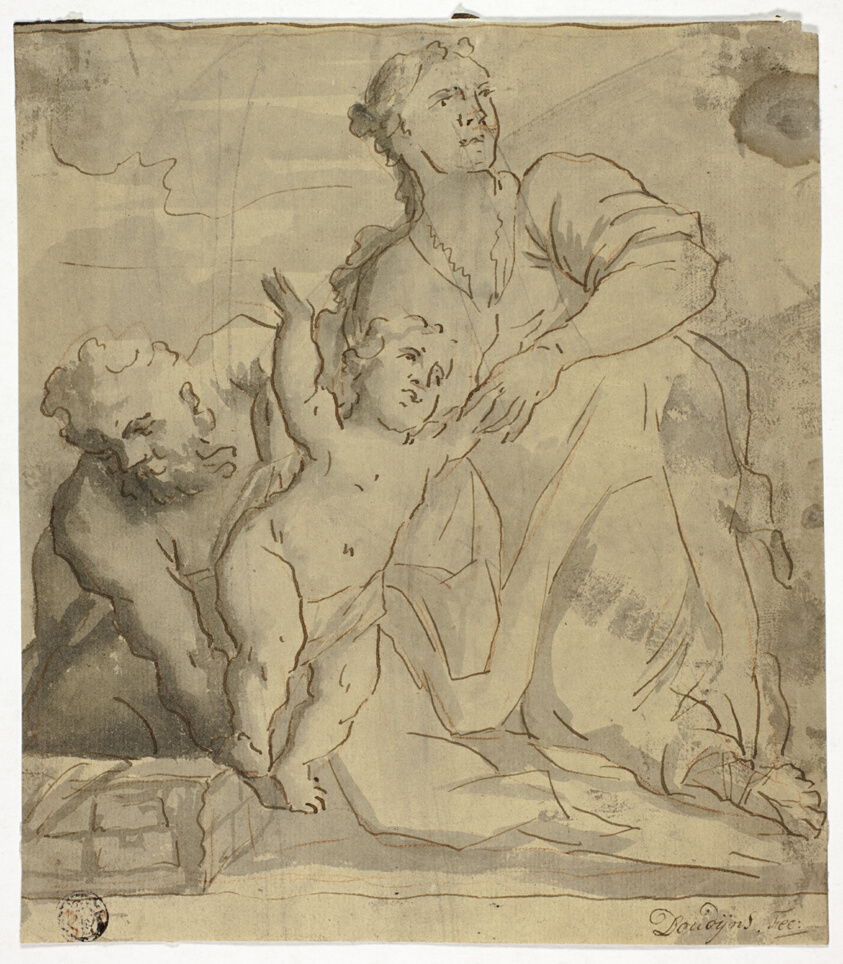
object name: Drawing and Watercolor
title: The Holy Family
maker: Willem Doudijns (Dutch, 1630-1697)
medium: Pen and black ink, with brush and gray wash, over black and red chalk, on tan laid paper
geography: Holland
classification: ink or chalk wash; drawings (visual works); prints and drawing